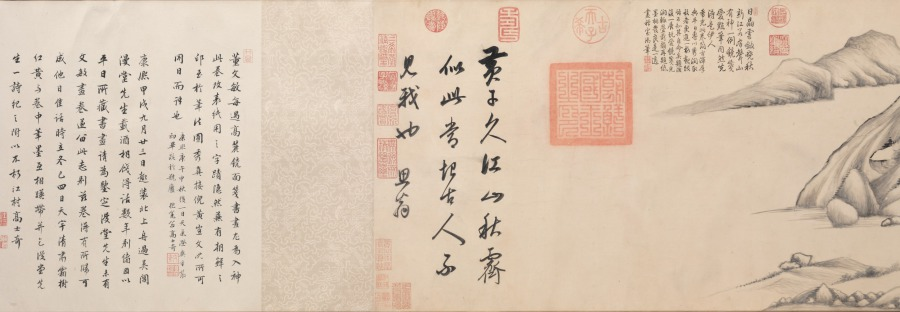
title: River and Mountains on a Clear Autumn Day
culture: China, Ming dynasty (1368–1644)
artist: Dong Qichang (Chinese, 1555–1636)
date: c. 1624–27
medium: Handscroll; ink on Korean paper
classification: Painting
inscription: 黃子久江山秋霽似此，當恨古人不見我也。思翁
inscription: 董文敏每遇高麗鏡面箋，書畫尤為入神。此卷改表紙用之，字跡隱然，兼有朝鮮之印。至於筆法圓秀，真接倪黃。豈文沈所可同日而語也。 康熙庚午中秋後一日，天氣澄爽，重裝初畢，跋於瓶廬。抱瓮翁高士奇。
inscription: Second inscription by Gao Shiqi 高士奇 (1645–1704): On the twenty-third day of the ninth month, the jiaxu year of the Kangxi era [1694], I packed my bags to head north. When my boat passed Wuchang [Suzhou], Mr. Mantang [Song Luo] brought wine to bid me farewell so that we could share our thoughts on our separation in the last few years. I showed him the paintings and calligraphy which I collected and asked his opinions. Since Mr. Mantang does not own any handscrolls by Wenmin [Dong Qichang], I leave this one for him in commemoration of our parting; thus the painting will have a worthy owner and our meeting will become a beautiful story in the future. It is the fourth day after the beginning of winter, with the sky clear and sober. Trees under frost have turned red and yellow, seemingly echoing the brush and ink in the painting. I also ask Mr. Mantang to inscribe a poem to commemorate our meeting so that it will survive forever.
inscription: 1 colophon and 4 seals of Song Luo 宋犖 (1634–1713): Who is the foremost art connoisseur of our dynasty?/ Tangcun [Liang Qingbiao, 1620–1691] is dead, so the title passes to Jiangcun [Gao Shiqi]./ Leaving office, you retired for five years in the Lake region./ Fondling handscrolls and hanging scrolls from morning to evening./ You sent me your collection catalogue Xiao Xia Lu last year;/ It is indeed the true equal of [Zhou Mi's] Yun Yan Guo Yan./ This year you returned to the capital by imperial order;/ Your boat with calligraphy and paintings anchored at the river bank in Suzhou./ When we met each other you did not waste any time for conversation by poured out immediately/ From your "coral net" extraordinary treasures./ You produced incomparable scrolls, with gold-inscribed labels and jade rollers,/ Pouring out from bags and trunks, they were spread in disarray./ Without a word, I rolled and unrolled until my fingers were numbed,/ We sat straight, facing each other quietly, and never felt tired./ For three days we forgot about sleeping and food./ And at times we shouted our joy out loud, forgetting who is host or guest./ Your Dwelling in the Fuchun Mountains and the Yuansheng manuscript/ These peerless works I myself examined with delight./ As an added pleasure to the farewell dinner under the Maple Bridge,/ You allowed me to hold again this handscroll by Dong Qichang--/ The Misty River and Piled Peaks [by Zhao Mengfu] and this Clear Autumn Day are two extraordinary masterpieces./ In showing such life and spirit with "qi yun." the artists were truly "men of heaven."/ The Clear Autumn Day is not even three feet long,/ Painted on tributary Korean paper, it shines like silver./ Every building up and every turn of the mountains imitates nature,/ Every tree and every rock is removed from the commonplace./ From the beginning, the theory of poetry is the theory of painting,/ Like the lotus and the morning sunshine, they complement and refresh each other./ The artist's inscription regrets that "the Old Masters cannot see my scroll."/ Huang Gongwang would have agreed in his grave./ The vermilion of the seals glitter and dazzles the eyes,/ These added accessories are as valuable as jade./ You are very kind to give it to me,/ The feelings expressed in your inscription are so sincere./ Wanting to refuse, but unable, I accept it to respect your wish,/ And taking off my gown and cap I wrapped it with care./ You asked me to write a long poem in commemoration of this beautiful occasion,/ I am too ashamed that my effort in response is so poor and inadequate./ Returning home, I unrolled it under candlelight, trying to write the colophon,/ The light of the waning moon shines at the foot of the mossy wall./ Earnestly humming and brows knit in deep thought, I try to compose;/ The verses are not outstanding, but the facts are real./ With this poem recorded at the end of the scroll, I mail it to you for approval,/ This poem and this painting shall outlast a thousand springs. (Translation by LYSL/HK/WKH)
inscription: 1 colophon and 2 seals of Shao Changheng 邵長蘅 (1637–1704); 2 inscriptions and 14 seals of the Qianlong 乾隆 emperor (r. 1736–95); 1 seal of the Jiaqing 嘉慶 emperor (r. 1796–1820); 3 seals of the Xuantong 宣統 emperor (r. 1908–11); 1 seal unidentified.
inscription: [印] 朝鮮國王之印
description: Dong Qichang had a tremendous impact on the artistic practices and historiography of later generations; his works and writings shaped literati aesthetics. Here, Dong places an abstract landscape composition diagonally across the picture plane, configured to recall earlier masters and simultaneously express his own personal style. Dong’s inscription claims, Huang Gongwang’s Autumn Day, looks like this. I truly regret the master has not seen my work. In fact, Dong Qichang may have had Dong Yuan’s Xiao and Xiang Rivers in mind, a work he owned and considered a key work in Chinese art history.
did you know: The painting has an imprint of a Korean seal that reads "Seal of the king of Joseon."